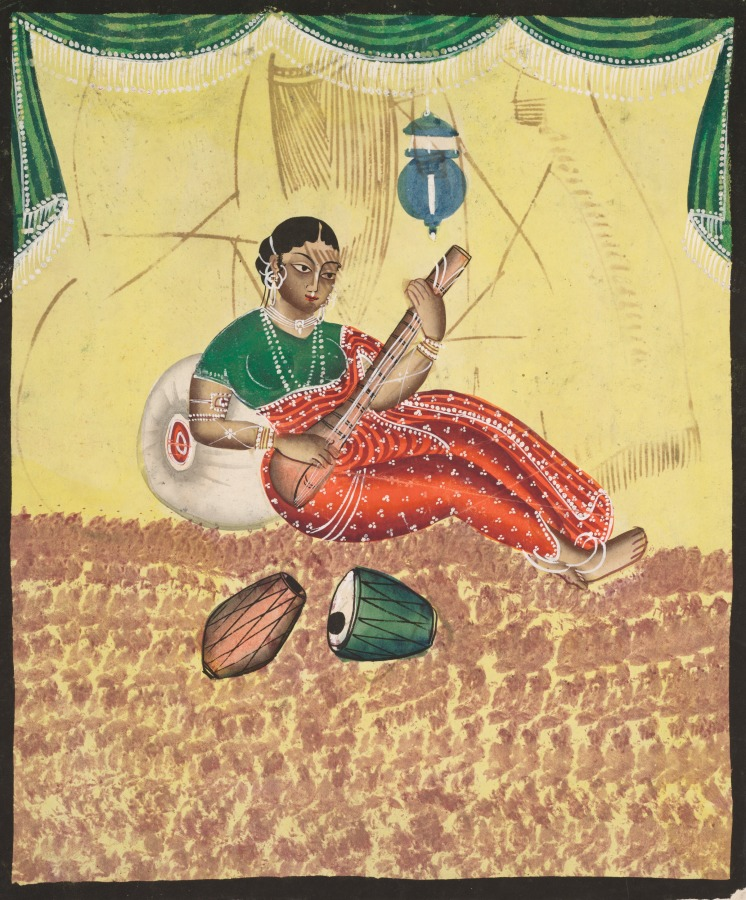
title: Woman Playing Music (recto), from a Kalighat album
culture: Eastern India, Bengal, Kolkata, Kalighat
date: c. 1890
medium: Gum tempera, graphite, and ink on paper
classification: Painting